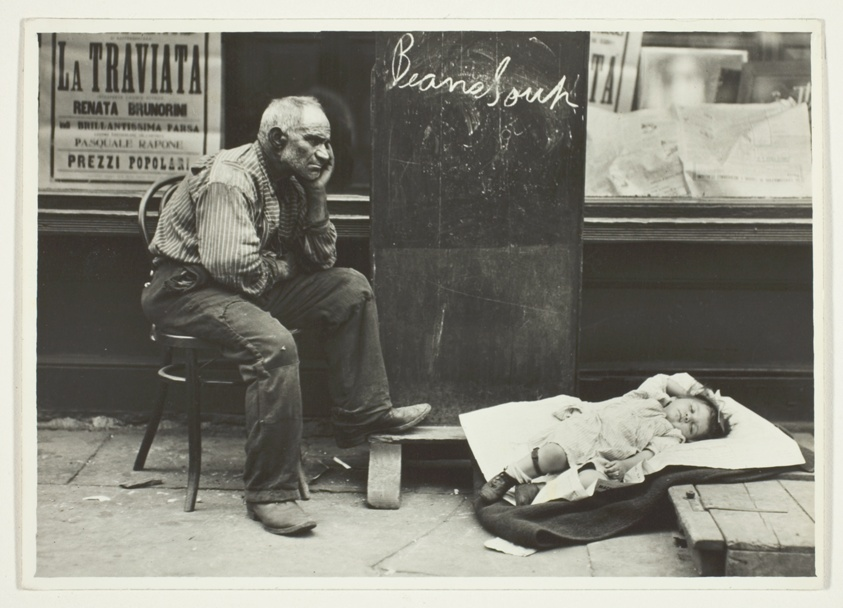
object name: Photograph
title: Fresh Air for the Baby, New York East Side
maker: Lewis Wickes Hine (American, 1874–1940)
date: c. 1910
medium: Gelatin silver print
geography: United States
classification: gelatin silver (developing-out-paper) pr; photographic process; photography; photograph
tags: Collected by Hugh Edwards, documentary